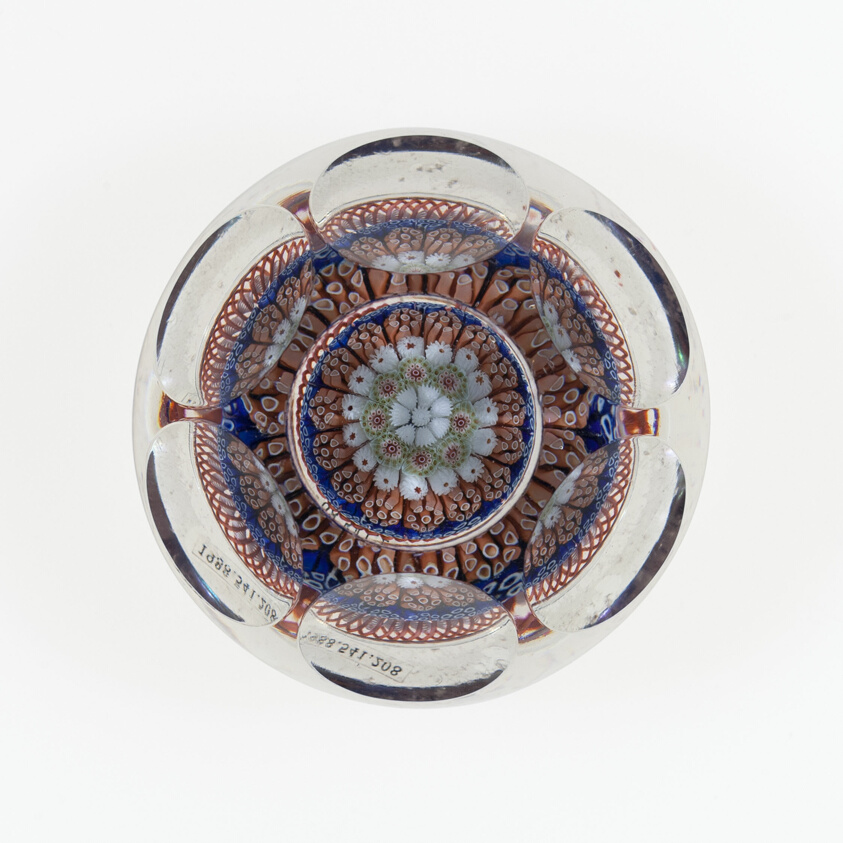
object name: Glass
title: Paperweight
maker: Saint-Louis Glassworks (Cristalleries de Saint-Louis); Lorraine, France, founded 1586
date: c. 1848–55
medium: Glass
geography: Saint-Louis-lès-Bitche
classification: paperweight; glass